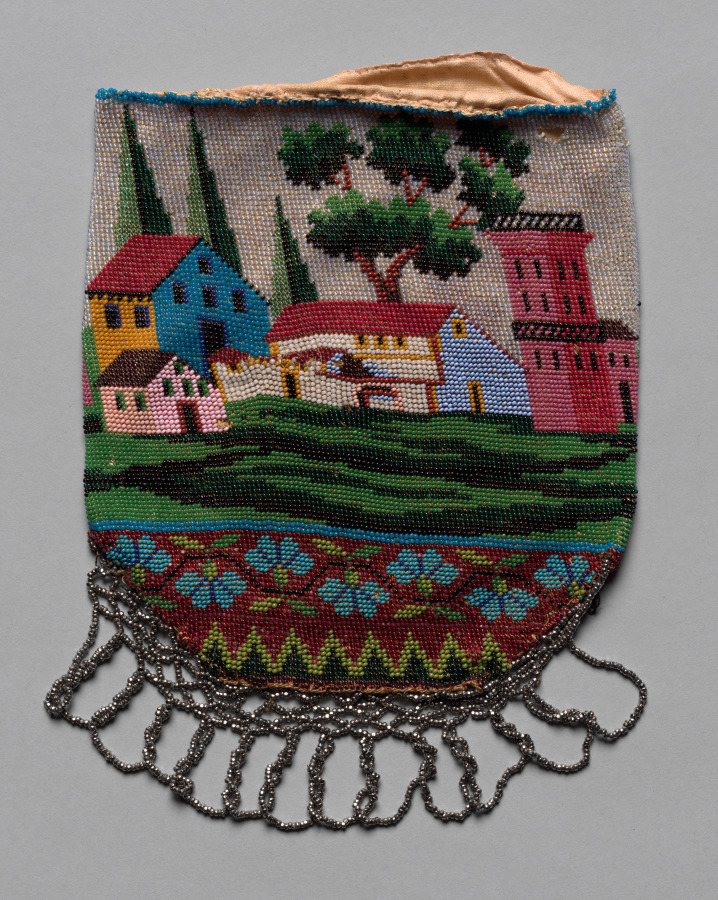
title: Beaded Bag (landscape scene)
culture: America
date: 19th century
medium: metal beads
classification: Garment